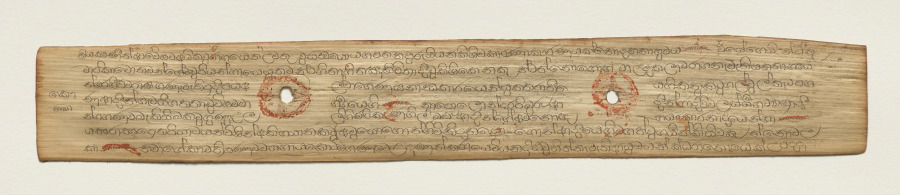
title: Leaf from a Buddhist Manuscript (recto)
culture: Sri Lanka, Singhalese, Late 17th century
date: c. 1700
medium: fiber paper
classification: Manuscript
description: Palm leaf material is still used for manuscripts in Sri Lanka. The palm leaves are prepared first by boiling them, drying them in the sun, and then rubbing them with oils. Scribes then use a metal stylus to incise the text. Then charcoal powder is wiped across the pages, filling in only the inscribed lines.